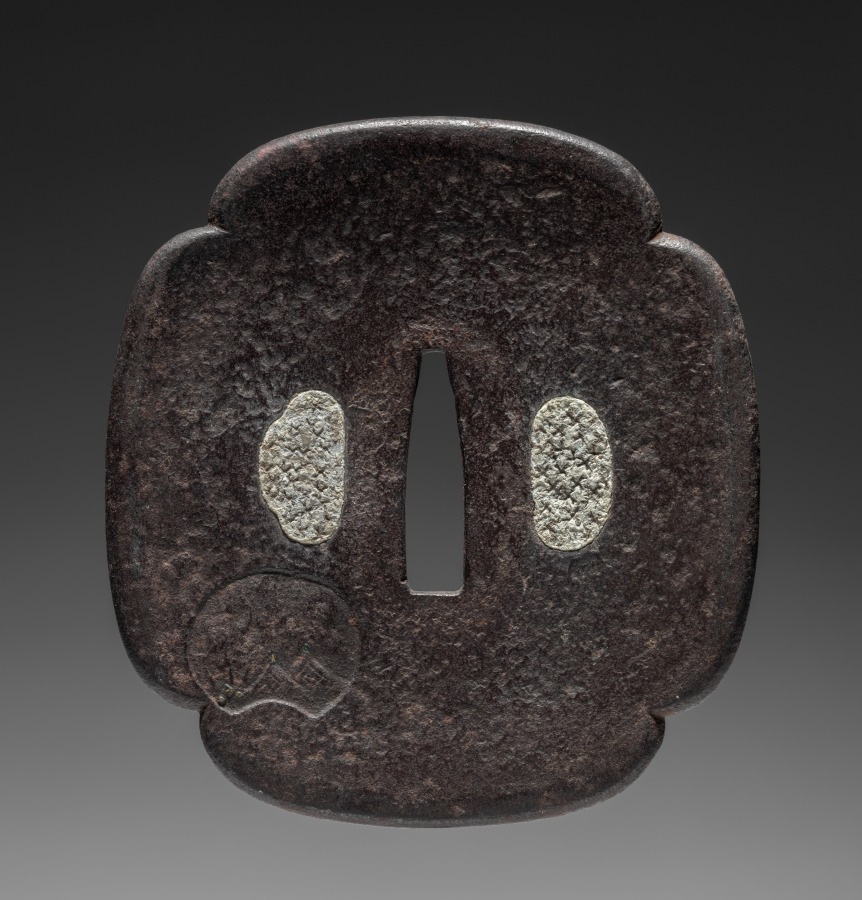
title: Sword Guard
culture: Japan, Edo period (1615–1868)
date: late 1600s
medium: iron (Kaneie type)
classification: Arms and Armor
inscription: signed "Kaneiye, residing at Fushimi."